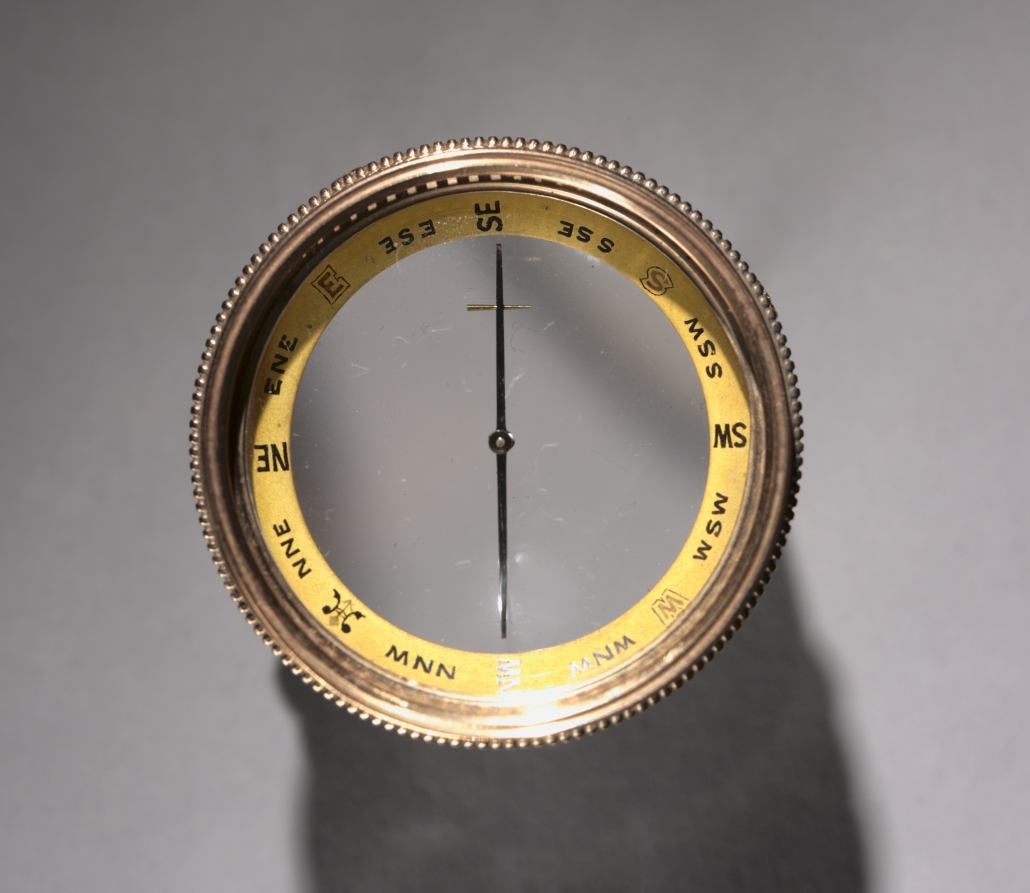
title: Miniature Table with Compass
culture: Russia, St. Petersburg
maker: House of Fabergé (Russian, 1842–1918)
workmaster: Mikhail Evlampievich Perkhin (Russian, 1860–1903)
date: c. 1890–95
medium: gold, enamel, glass, steel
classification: Miscellaneous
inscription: 56, crossed anchors [assay mark for St. Petersburg, 1882-99]; initials of workmaster Mikhail Perkhin (in Cyrillic); Fabergé (in Cyrillic).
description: The giving of small precious objects as intimate gifts between family members within the imperial court was spurred by the House of Fabergé's seemingly endless supply of bejeweled utilitarian objects decorated as expensively as possible, such as this little desk compass disguising as a miniature table in the Louis XVI taste of the late 1700s.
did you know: A small compass is concealed in the top of this miniature table for use when looking at maps.